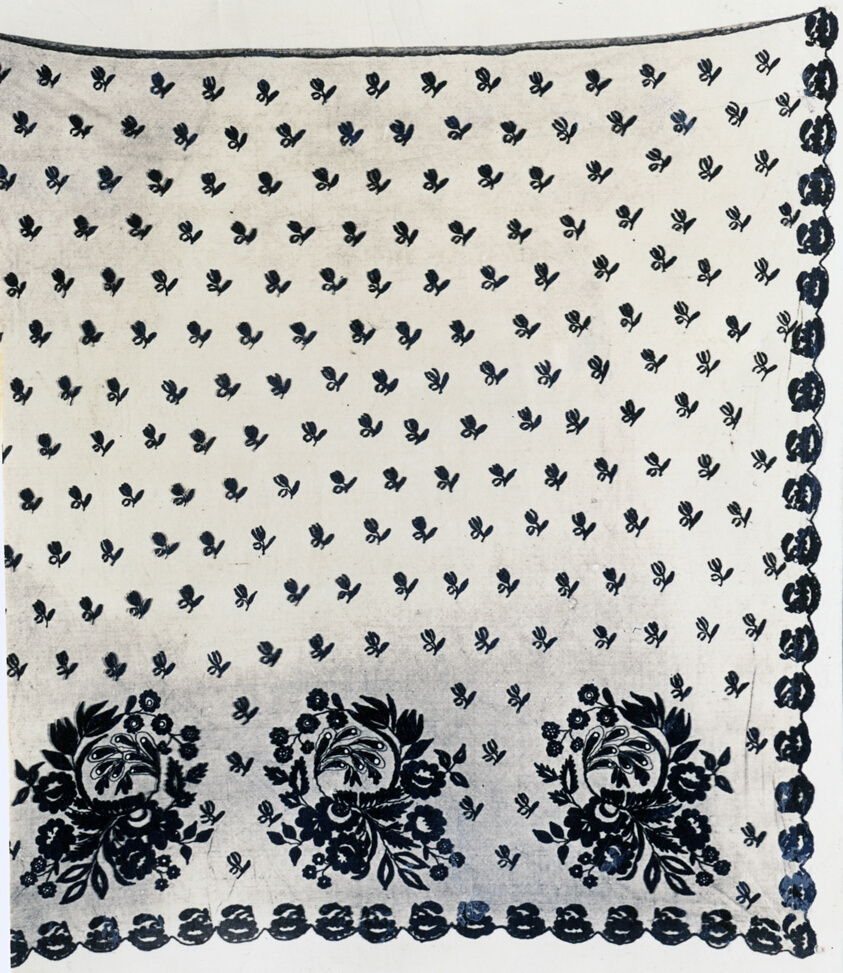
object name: Textile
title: Veil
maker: Mary Chadbourne Keith Norton (American, 1807-1890); United States, probably Maine, South Berwick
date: c. 1810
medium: Silk, machine-made net; embroidered with silk in darning and running stitches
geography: United States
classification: textile; lace - mixed